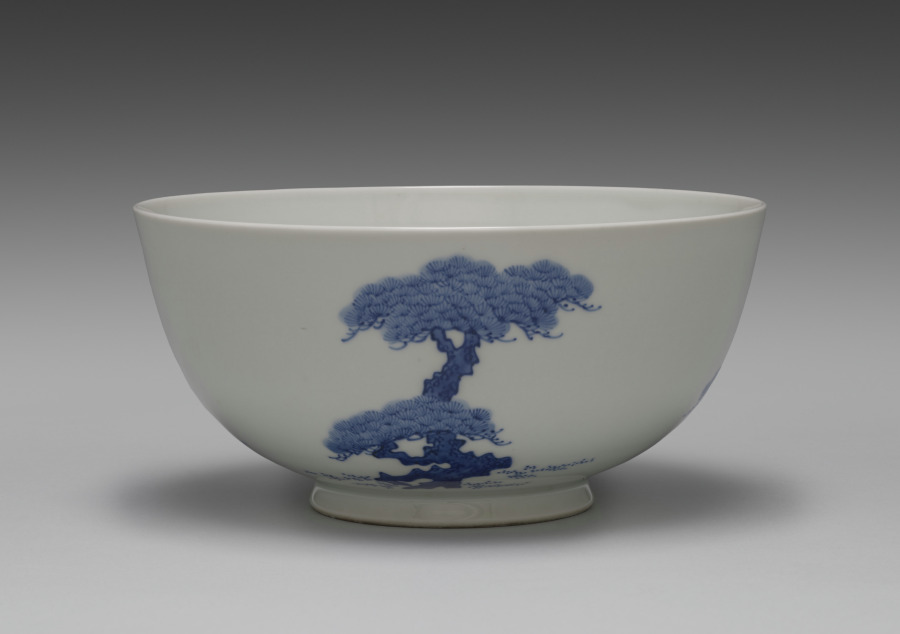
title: Bowl with Pines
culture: Japan, Meiji period (1868–1912)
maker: Seifū Yohei III (Japanese, 1851–1914)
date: 1893–1914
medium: porcelain with underglaze blue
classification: Ceramic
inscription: Inscription by Seifū Yohei IV on the box states that the bowl is the work of Yohei III.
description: The bowl has slightly more detailed surface designs painted in blue under the glaze than some other Yohei III's other teaware, like the Water Cooler with Pines, CMA 2022.163. The three pines, with two, three, and four racks of boughs respectively, have more angular rather than curved trunks, with clearly articulated bark.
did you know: The box for the bowl carries an attestation by Yohei IV that it is the work of his predecessor.